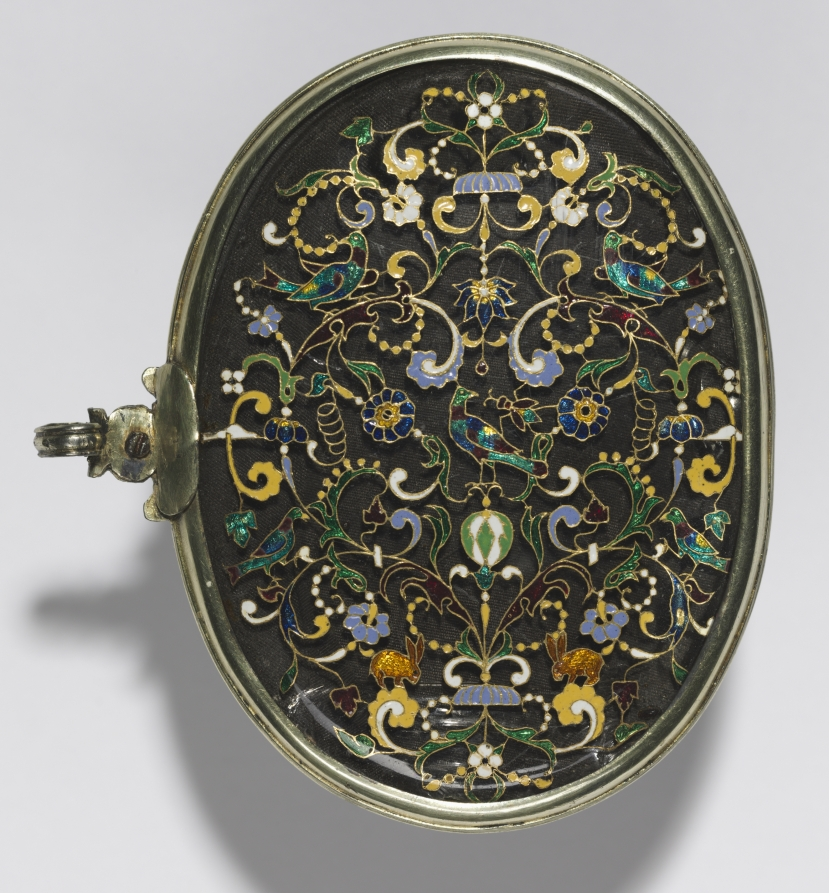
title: Mirror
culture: France, 16th century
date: mid-late 1500s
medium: cloisonné enamel on glass or rock crystal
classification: Enamel